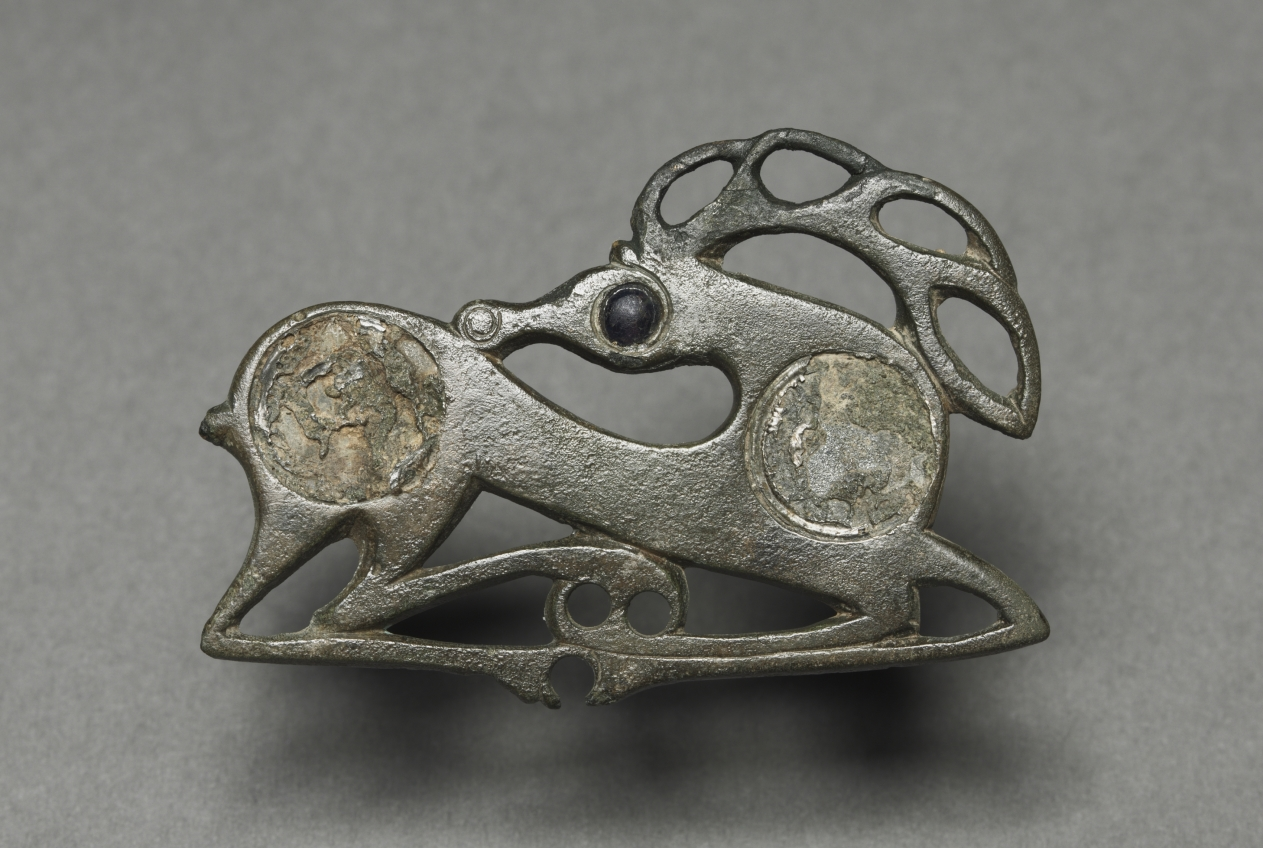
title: Fibula in the Form of a Recumbent Stag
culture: Northeastern Europe, 5th century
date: c. 400 CE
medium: bronze with glass inlay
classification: Jewelry